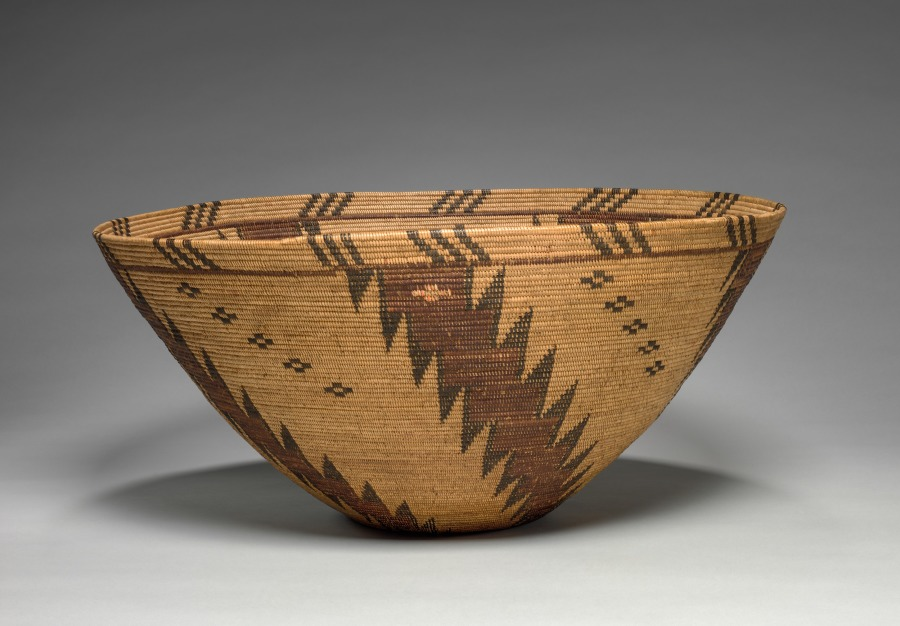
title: Presentation Bowl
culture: Native North America, Great Basin, California, Death Valley, Timbisha (Panamint) Shoshone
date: 1880–90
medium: devil's claw, sumac, yucca root, orange-shafted flicker (woodpecker) quills; coiled (2 rod and bundle of deer grass or basket grass)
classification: Basketry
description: This basket was made for the Euro-American collectors’ market in the early 1900s but it is modeled on basketry bowls from which the Timbisha (Panamint) Shoshone once served food. When used indigenously, the main view would have been of the interior. The two small, pink crosses, made of flicker (woodpecker) quills, may be a maker’s mark. Made-for-sale baskets testify to Indigenous women’s truly creative, resilient responses to forces that endangered their livelihoods and existence.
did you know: The two small, pink crosses on this basket may be a maker’s mark.